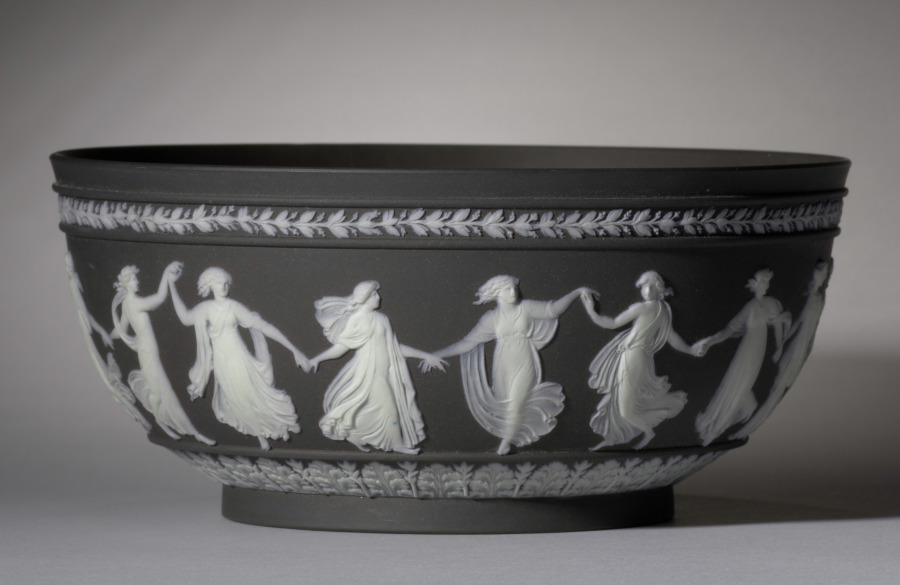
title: Bowl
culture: England, Staffordshire, 19th century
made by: Wedgwood Factory (British)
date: 1800–1850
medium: black basalt ware with applied decorations in white jasper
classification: Ceramic